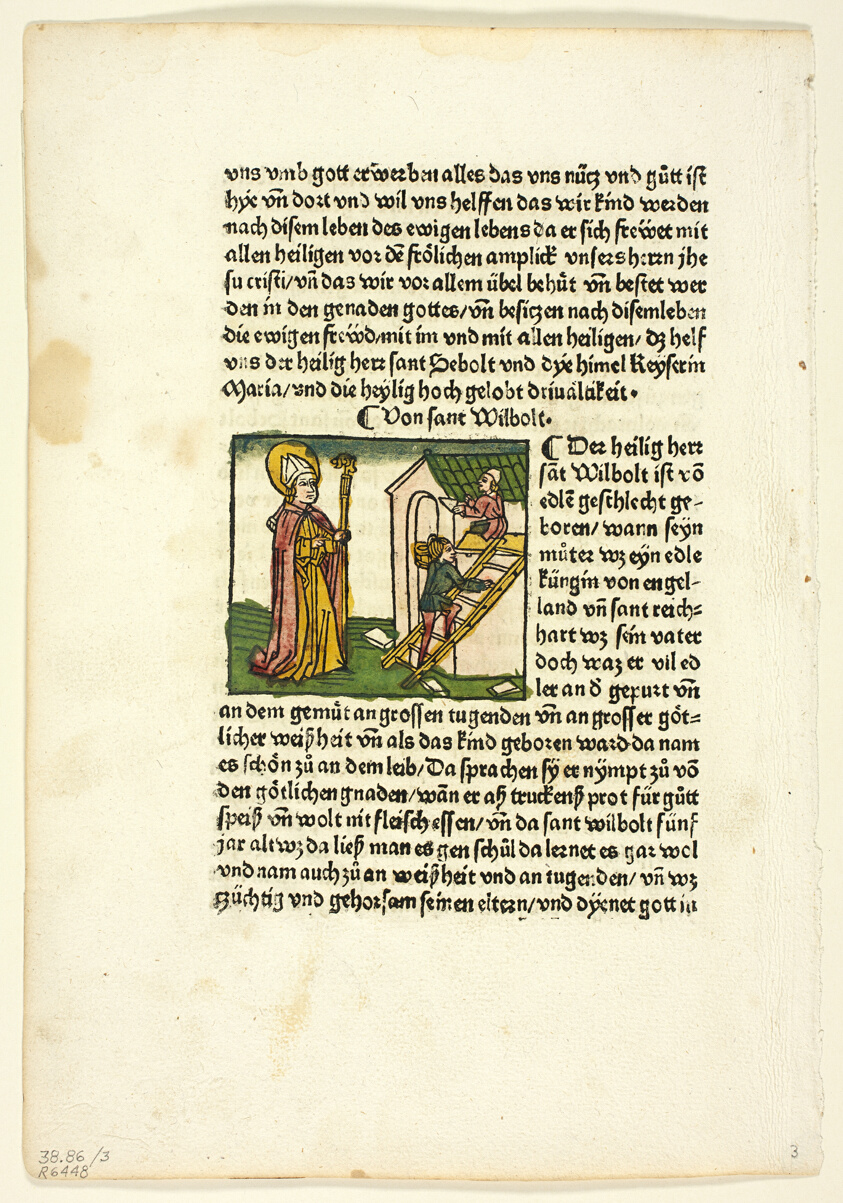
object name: Print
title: Saint Wilbolt from Heiligenleben, Winterteil (Lives of the Saints—Wintertime), Plate 3 from Woodcuts from Books of the 15th Century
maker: Unknown Artist (Augsburg, 15th century); printed and published by Johannes (Hans) Baemler (German, 1435-1504); original text by Jacobus de Voragine (Italian, c. 1230–1298); portfolio text by Wilhelm Ludwig Schreiber (German, 1855–1932)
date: 1475, portfolio assembled 1929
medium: Woodcut in black with hand-colored additions, and letterpress in black (recto and verso), on cream laid paper, tipped onto cream wove paper mat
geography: Germany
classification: woodcut; print; prints and drawing